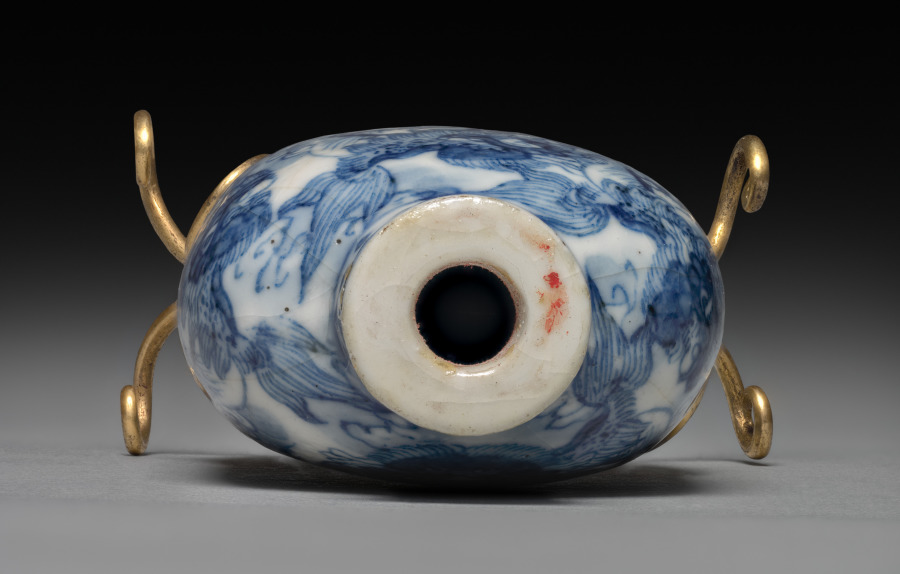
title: Flattened Ovoid Snuff Bottle with Stopper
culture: China, Jiangxi province, Jingdezhen kilns, Ming dynasty (1368-1644), Wanli reign (1572-1620)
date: 1573–1620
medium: porcelain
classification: Ceramic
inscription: 萬曆年製